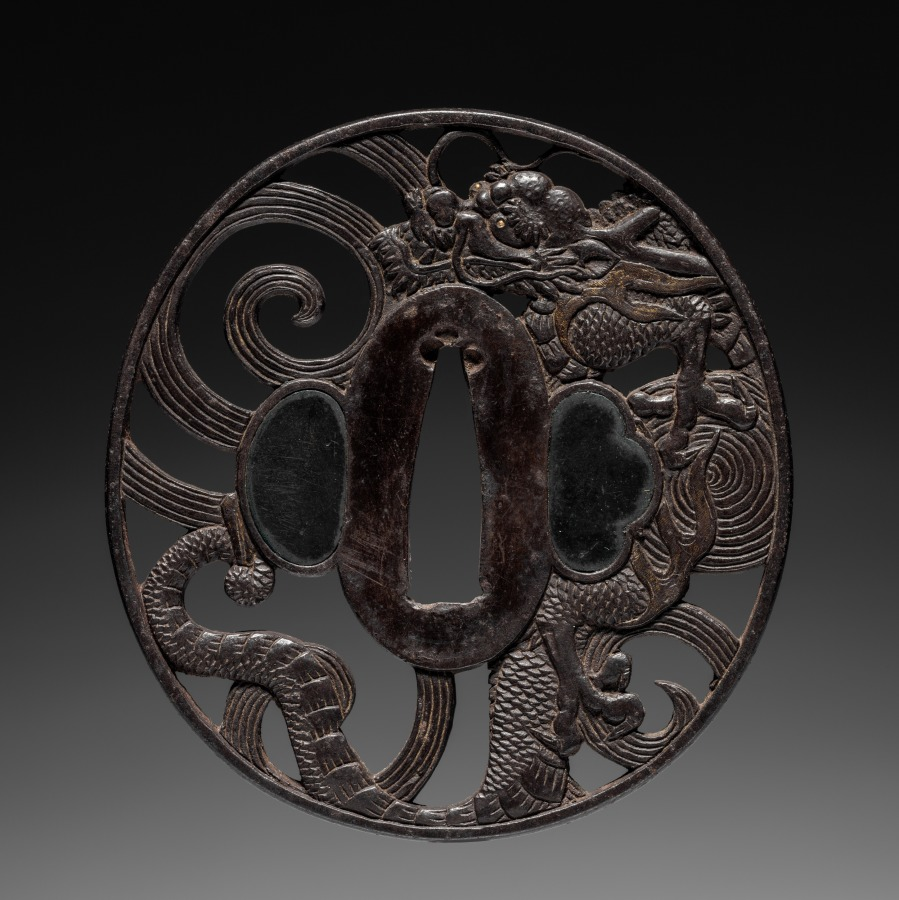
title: Sword Guard (Tsuba) with Dragon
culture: Japan, Edo period (1615–1868)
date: 1615–1868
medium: iron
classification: Arms and Armor